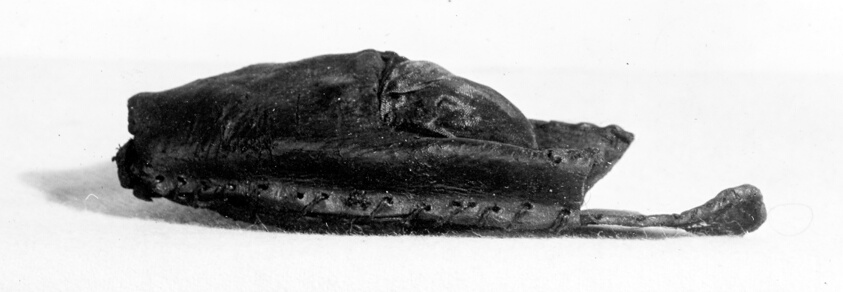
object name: Textile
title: Toe of a Shoe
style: tudor, european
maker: England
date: 16th century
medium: Leather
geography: England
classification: textile; costume accessory - shoe; shoes - misc; costume; dress (garment); clothing